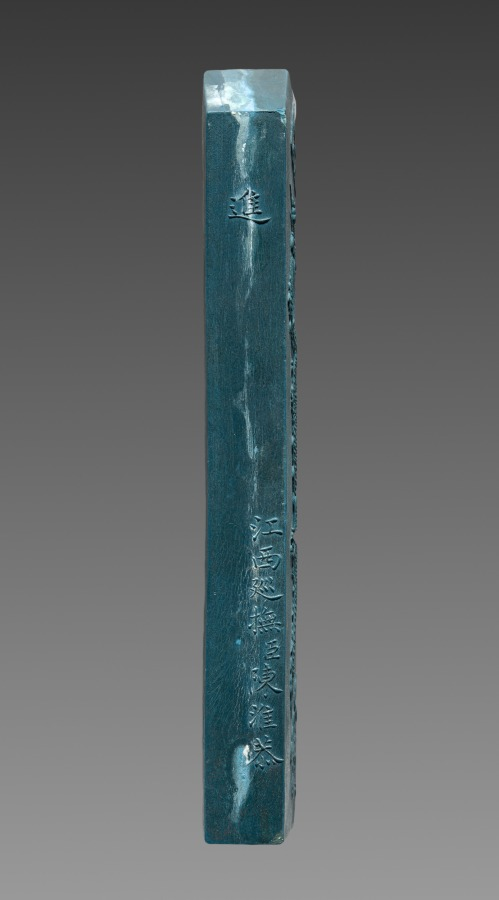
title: Box with Ink Cakes: Blue Ink Cake in Shape of a Gui Scepter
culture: China, Qing dynasty (1644-1911), Jiaqing reign (1795-1820)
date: 1795–1820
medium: Molded ink in blue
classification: Miscellaneous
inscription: 江西巡撫臣陳淮恭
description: Ink cakes (also called ink sticks) are dissolved with the addition of water and then ground on the surface of a flat square stone into liquid ink for painting and calligraphy. The precious ink cakes here, however, have never been used. The inscription on the side of the blue ink cake says that the set was commissioned by Chen Huai, Governor of Jiangxi Province.